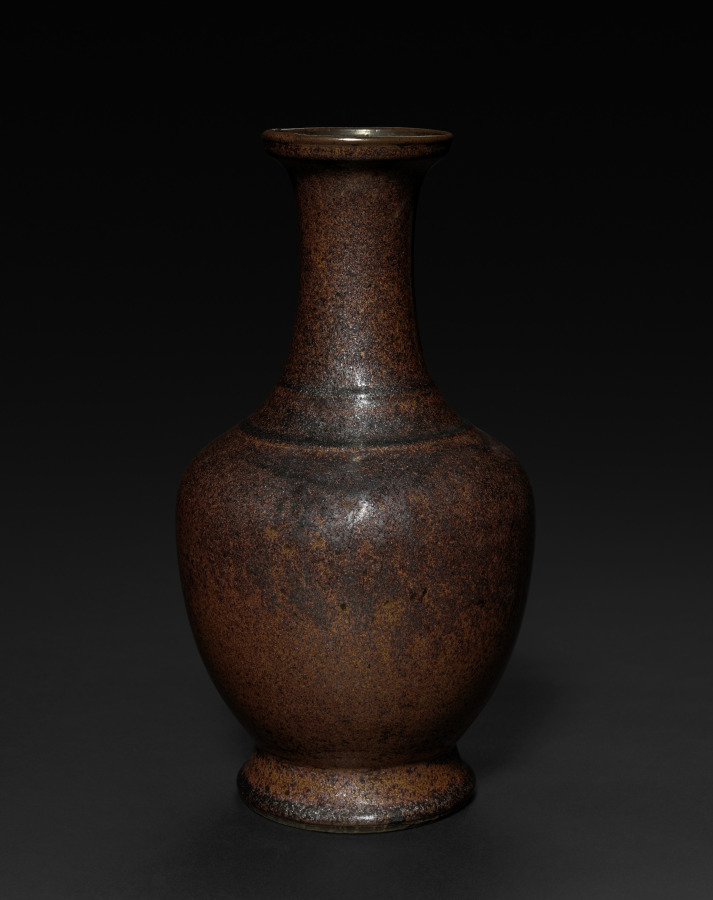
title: Vase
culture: China, Qing dynasty (1644–1911), Qianlong reign (1736–95)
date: 1736–95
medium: porcelain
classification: Ceramic